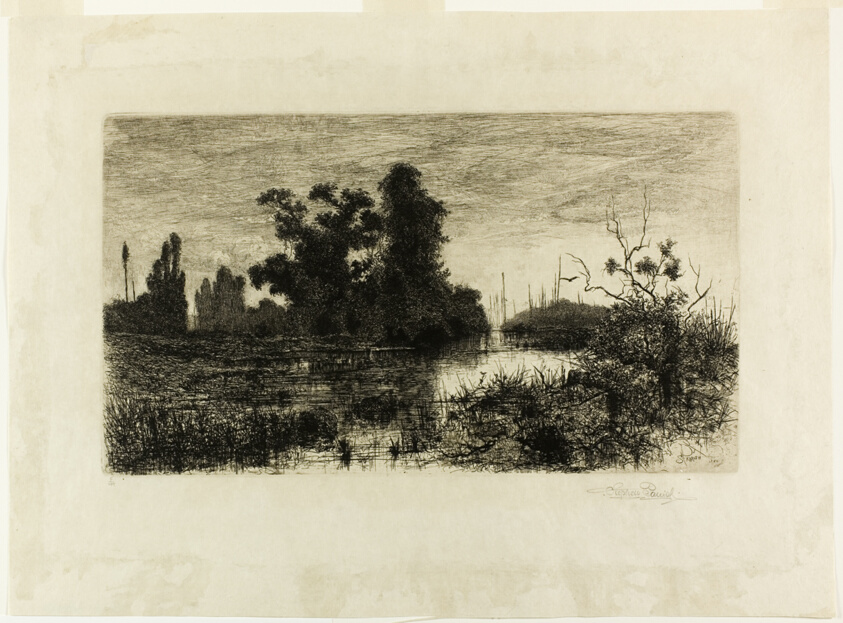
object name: Print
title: On the Schroon — Evening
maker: Stephen Parrish (American, 1846-1938)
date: 1880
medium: Etching on cream wove paper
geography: United States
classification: etching; print; prints and drawing